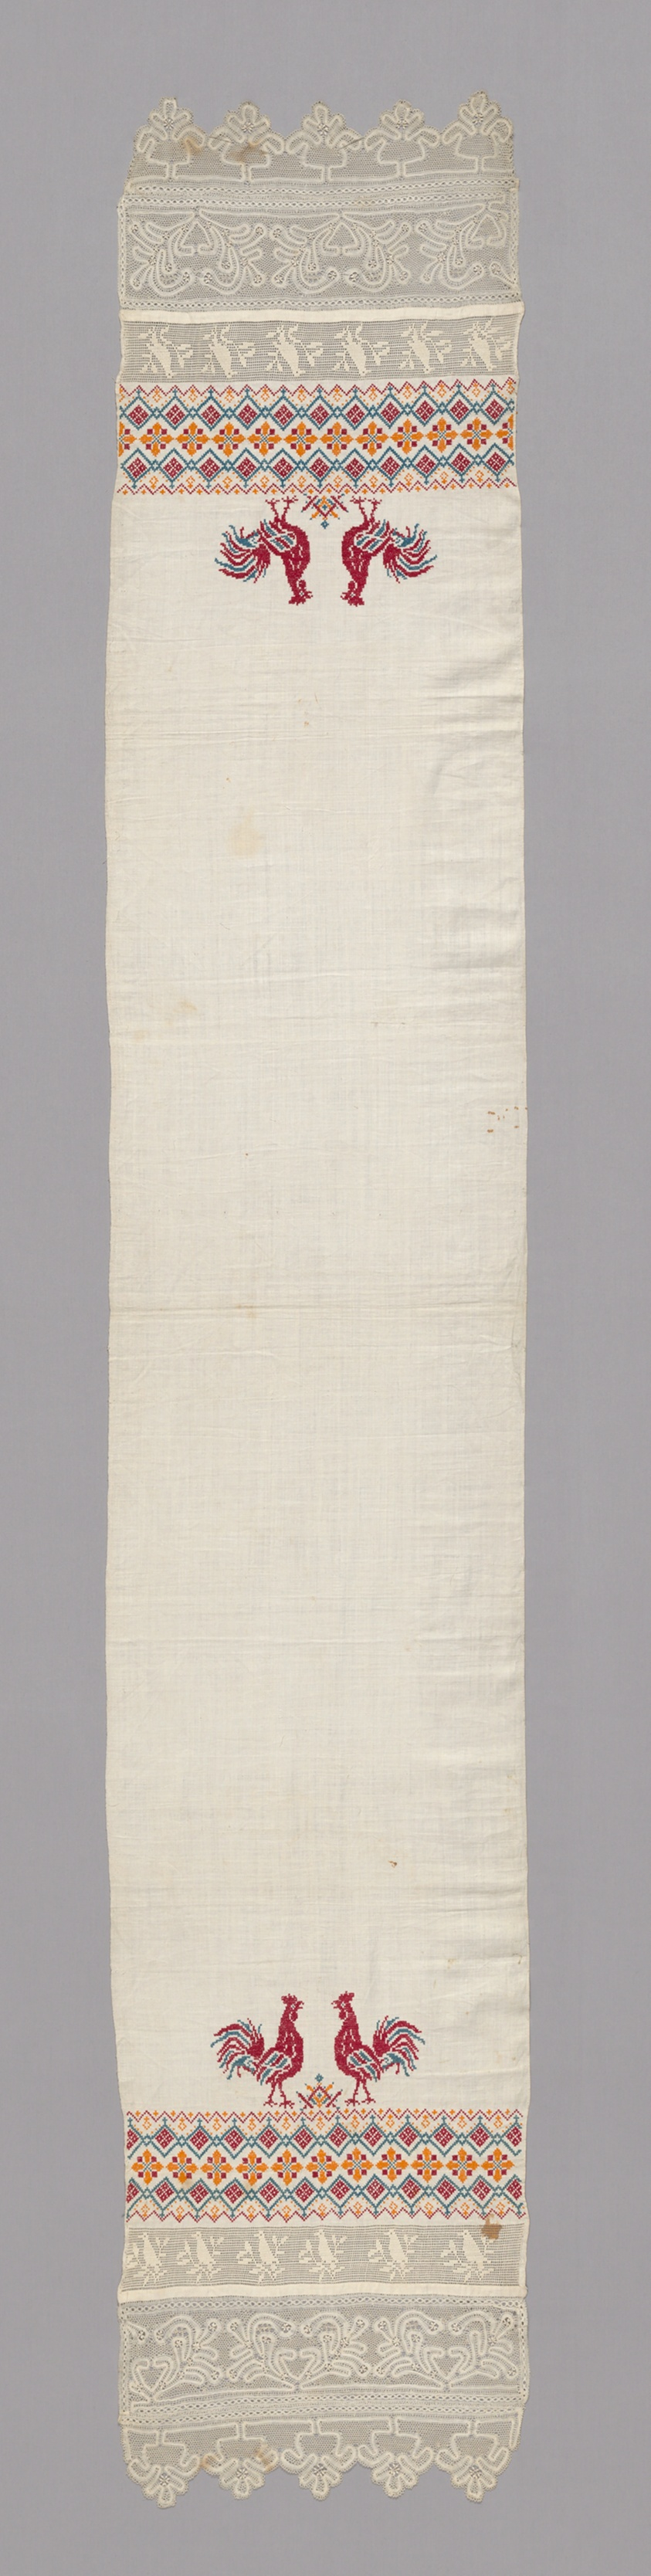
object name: Textile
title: Towel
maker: Russia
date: 19th century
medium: linen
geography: Russia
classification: textile; needlework (visual works)